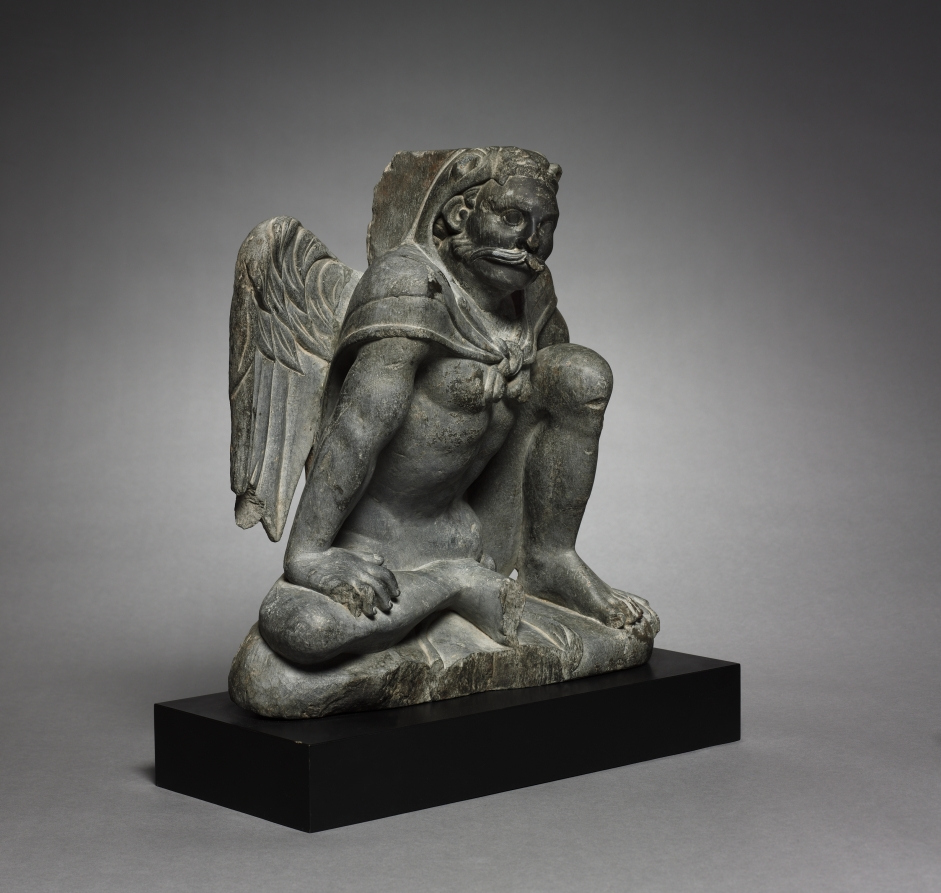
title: Winged Atlas-Hercules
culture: Pakistan, Gandhara, Gandhara period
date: 200s CE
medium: schist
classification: Sculpture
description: In Buddhist art of the Gandharan region during the time of heightened contact with the Mediterranean world, the figure of Atlas was adopted, but given wings so as to appear superhuman. This figure has been conflated with the image of Hercules, who wears the skin of the Nemean lion, and relieved Atlas of his duties for a short time. Repeated images of composite Atlas-like figures surrounded the base of the monuments called stupas, which were solid domes, and can be understood as symbols for the sky, which would have appeared as though supported by rows of titanic figures. Other examples of this figure hold a thunderbolt (vajra) in one hand, suggesting that he could also allude to Vajrapani, an early protector divinity of the Buddha. Images of Vajrapani can combine attributes of Hercules, Zeus, and Hermes.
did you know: This figure combines the attributes of Atlas, Hercules, and Vajrapani.